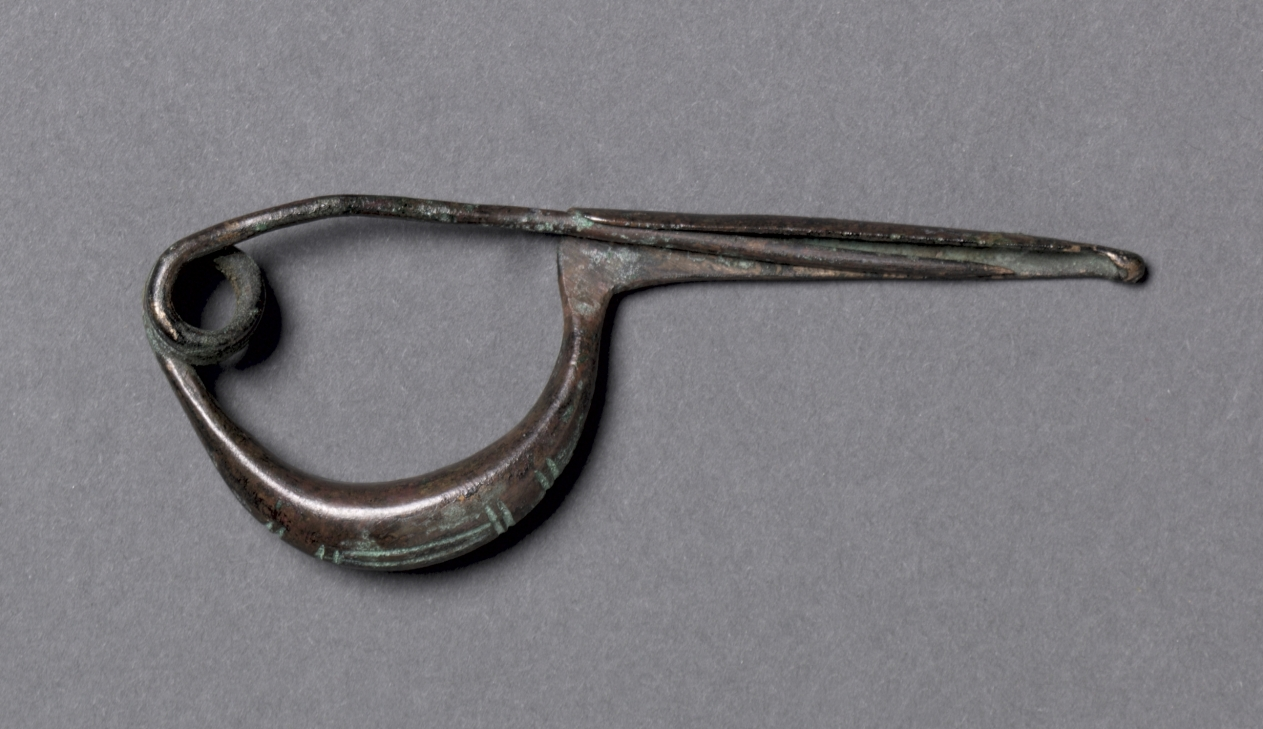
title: Boat-Shaped Fibula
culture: Etruscan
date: c. 700 BCE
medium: bronze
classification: Jewelry